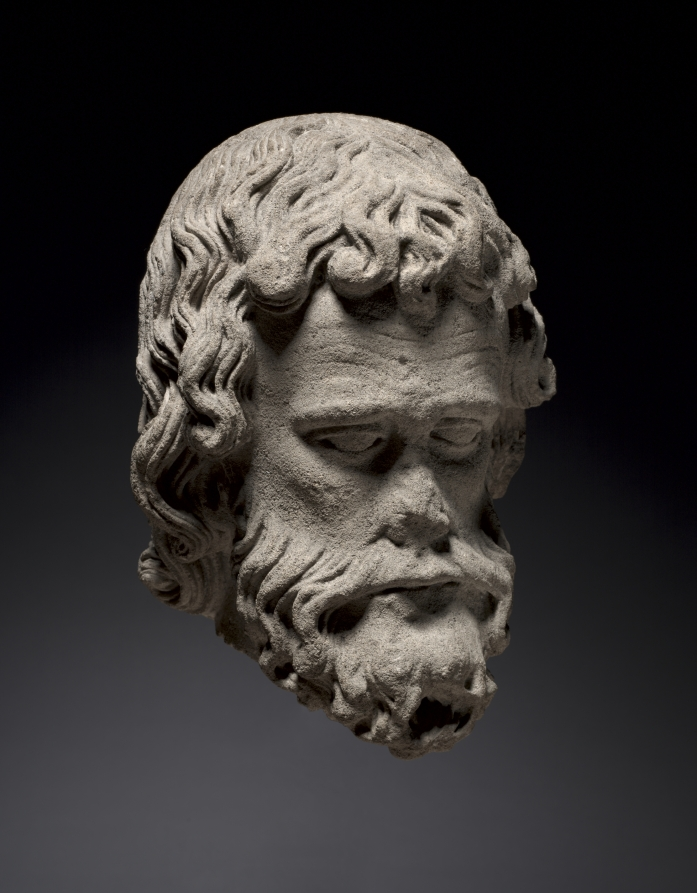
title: Head of an Apostle from the South Portal of the Cathedral of Thérouanne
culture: Northern France (Pas-de-Calais), Thérouanne, 13th century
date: c. 1235–1240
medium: oolitic limestone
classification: Sculpture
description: These monumental stone heads are among the substantial known remains of the sculptural program of Thérouanne’s cathedral, which was razed by Emperor Charles V of Spain in June 1553. These heads were found in a wall of rue Ste. Croix in the town of Saint Omer (a short distance to the north) in January 1923. This group of sculptures from the gable of the south portal of Thérouanne, which includes a stylistically related Christ as Judge, is recorded to have been moved to the Cathedral of Saint Omer in 1554. With their deeply carved wavy hair, curly beards, wrinkled foreheads, and ponderous facial features, these imposing heads—even in their now fragmentary and weathered state—attest to the powerful monumentality of the stone sculpture covering French church facades of the Gothic period.